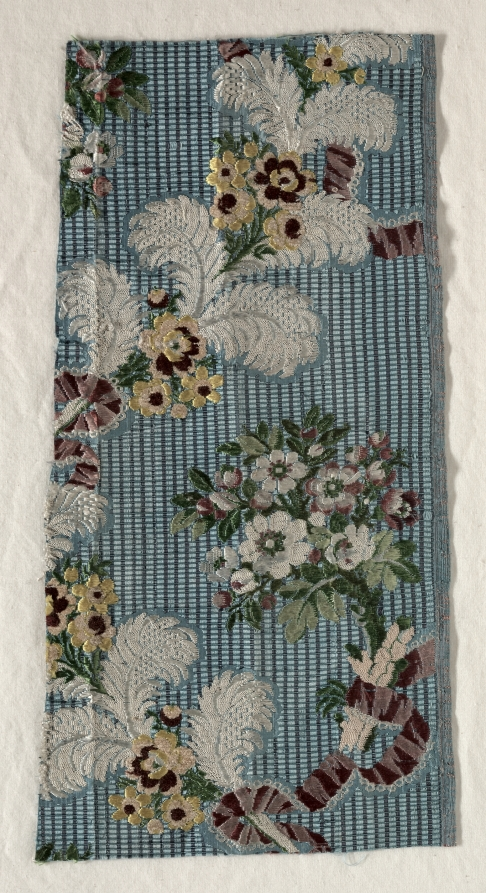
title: Fragment of Brocade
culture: England, mid-18th century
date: mid 1700s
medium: lampas weave, brocaded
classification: Textile